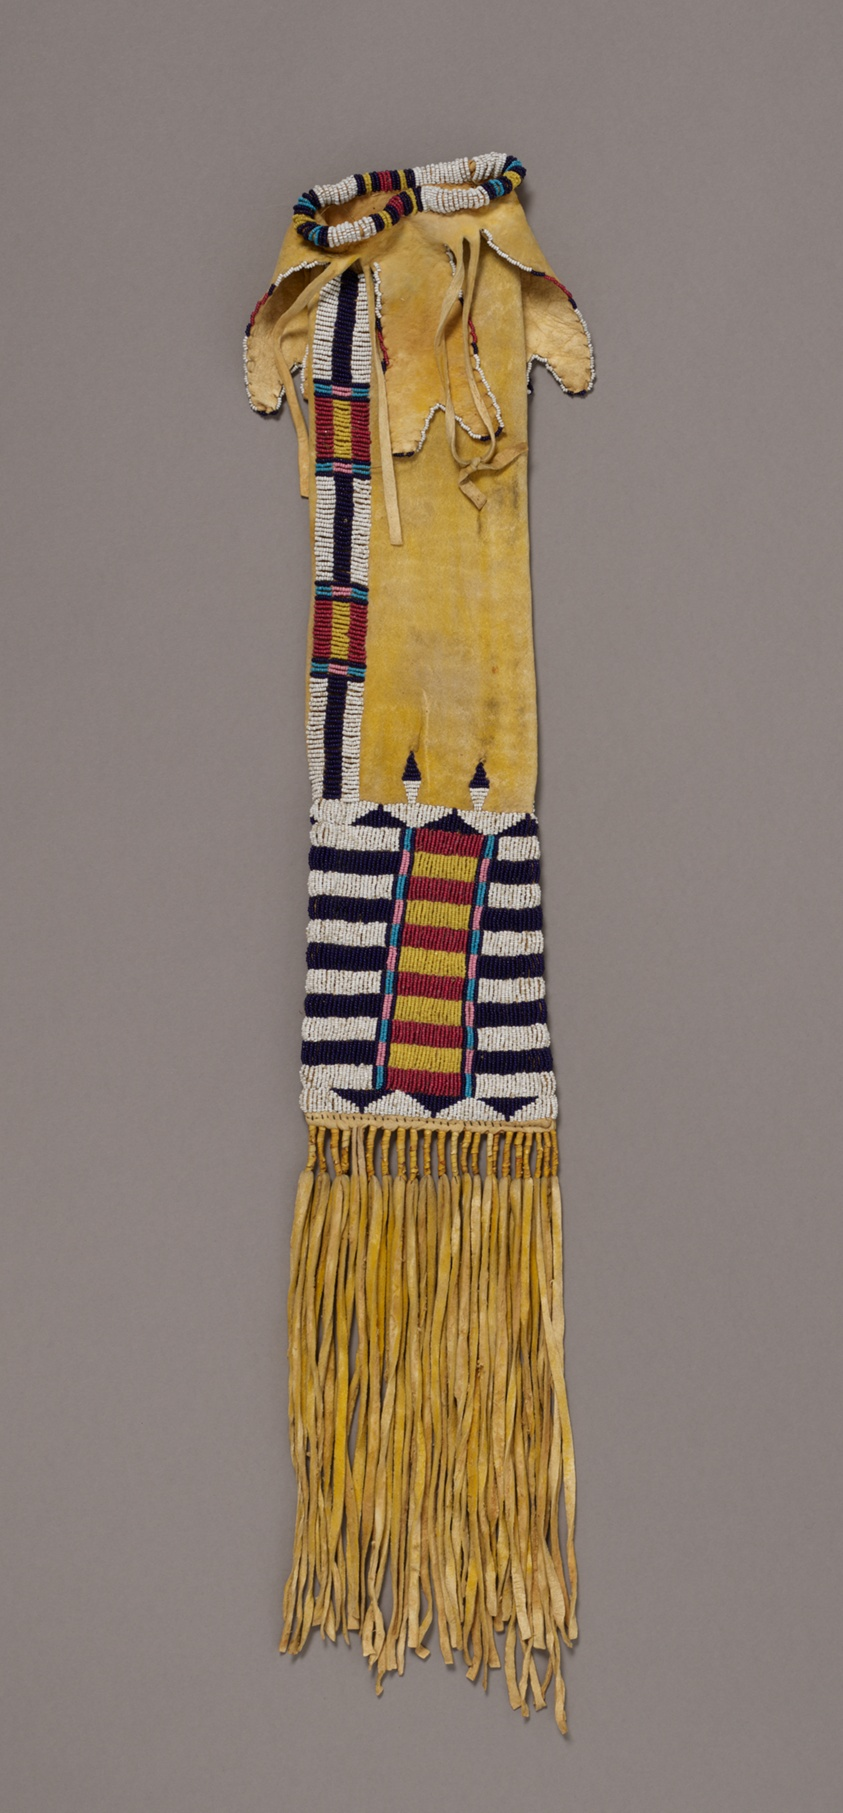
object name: Religious/Ritual Object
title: Pipe Bag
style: cheyenne, plains indian, native american, americas, Arts of the Americas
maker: Artist unknown (Cheyenne, Tsistsistas); Great Plains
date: c. 1865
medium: Leather, glass beads, and sinew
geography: Great Plains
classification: beadwork; costume accessory; art of the americas; ritual objects